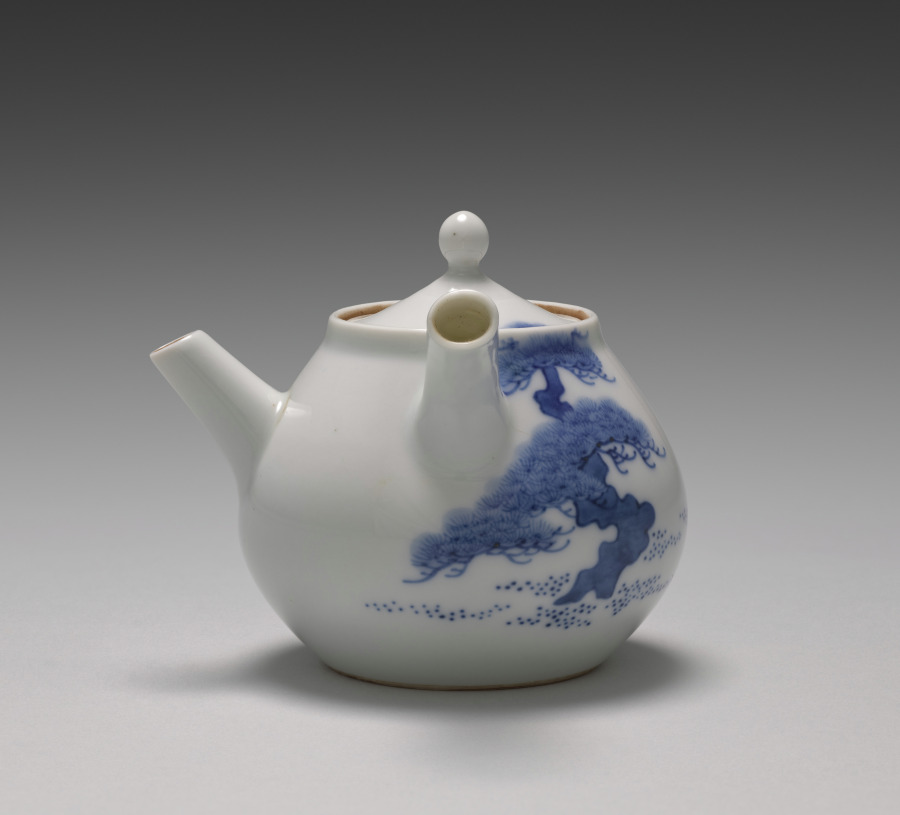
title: Teapot with Pines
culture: Japan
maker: Seifū Yohei III (Japanese, 1851–1914)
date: 1893–1914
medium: Porcelain with underglaze blue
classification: Ceramic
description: Side-handled teapots known as kyūsu and hot water coolers, or yuzamashi, are essential components of sencha tea sets. The teapot is, of course, meant for steeping and serving the tea. Yuzamashi are used to cool boiled water to the ideal temperature for the type of tea to be brewed. This teapot has a pine in underglaze blue on each side. The tip of one of these pines reaches onto the tiny lid, and as with the trees on the Water Cooler with Pines, CMA 2022.163, the trunks are curvy ribbons with little definition. Considering the execution of the two vessels' designs, one might imagine the pot and cooler to have been part of the same set.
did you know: This teapot with images of pines are among Seifū Yohei III’s designs painted in blue.